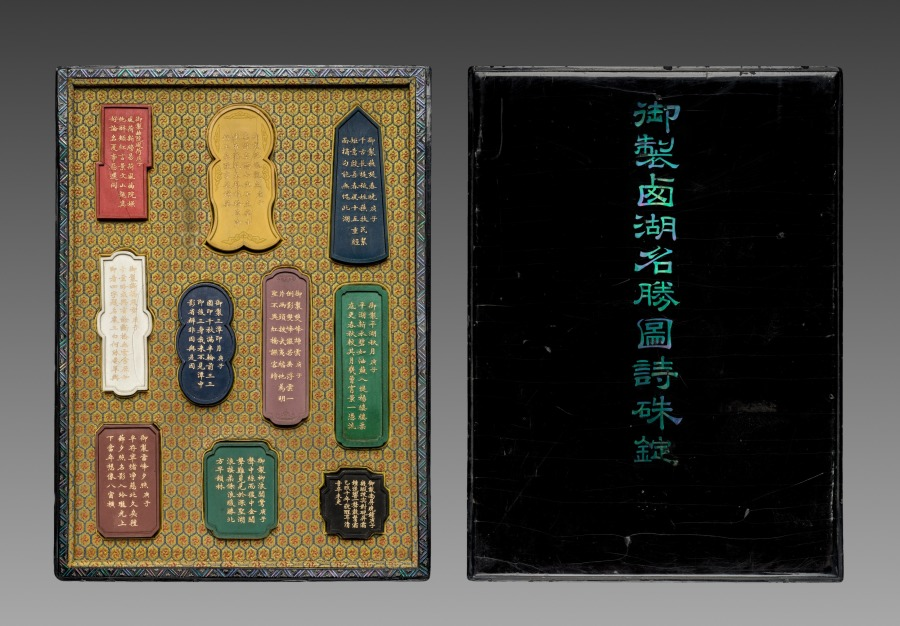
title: Imperially Commissioned Set of Ink Sticks with Images and Poems of Famous West Lake Sites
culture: China, Qing dynasty (1644–1911), Qianlong reign (1736–95)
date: 1780–94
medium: Molded ink in yellow, blue, black, green, red, brown, white, and gold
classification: Miscellaneous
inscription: 乾隆年製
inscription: The inscription in mother of pearl inlay on the box’s cover says: Imperially Made Gold Inscribed Poems of Images of [the Ten] Sights of the Westlake.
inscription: The poems on the ink sticks are published in Yuzhi shiji 御製詩集 [Collection of imperial poetry], vol. 4, juan 71, 6b–8b; and Qinding nanzun shengdian 欽定南巡盛典 [Grand ritual of the southern tour], juan 17, 17b–28b.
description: Each ink stick depicts one of the Ten Scenes of the West Lake on one side, and a corresponding imperial poem on the other, composed on emperor Qianlong’s fifth southern inspection tour in 1780. Notably, the ink sticks’ colors and shapes correspond with the poems’ respective content. An inscription on one ink stick identifies this set as a gift to the emperor by Jiang Lan, an official from Anhui, a province known for its excellence in ink, paper making, and printing. Imperial records note that 10 more sets of West Lake inks were presented as a tribute by Gioroi Giking (Chinese: Jueluo Jiqing, 1753–1802), a Zhejiang provincial governor and a bannerman (Manchu native).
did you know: The inscription in mother-of-pearl inlay on the box’s cover says: Imperially Made Gold Inscribed Poems of Images of [the Ten] Sights of the Westlake.